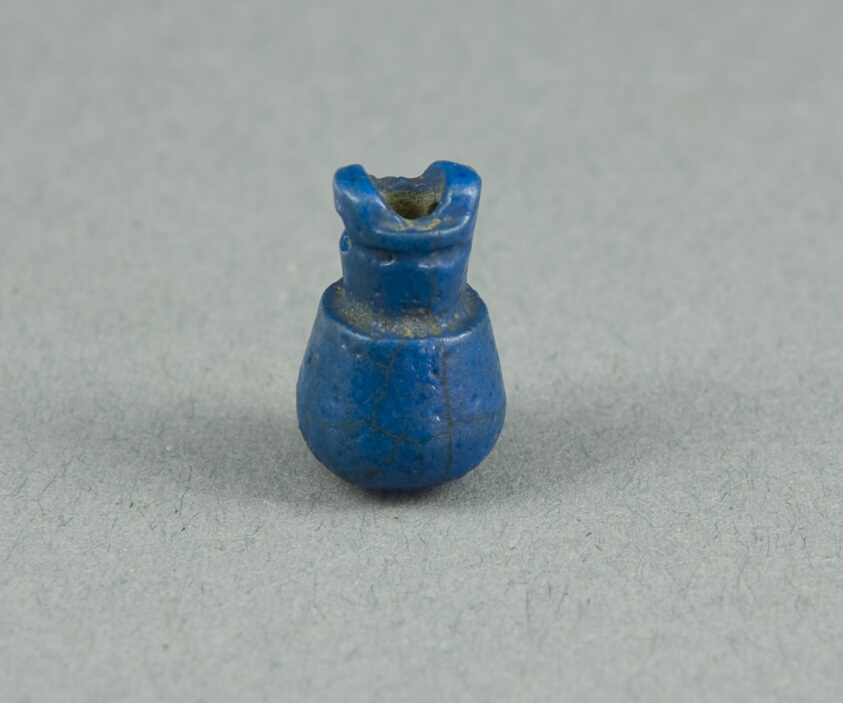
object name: Costume and Accessories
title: Amulet of a Situla (Jar)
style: egyptian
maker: Egyptian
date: Third Intermediate Period, Dynasties 21–25 (about 1069–656 BCE)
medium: Faience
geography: Egypt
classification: amulet; jewelry; ceramics; ancient art; costume; faïence (composite material)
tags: jar